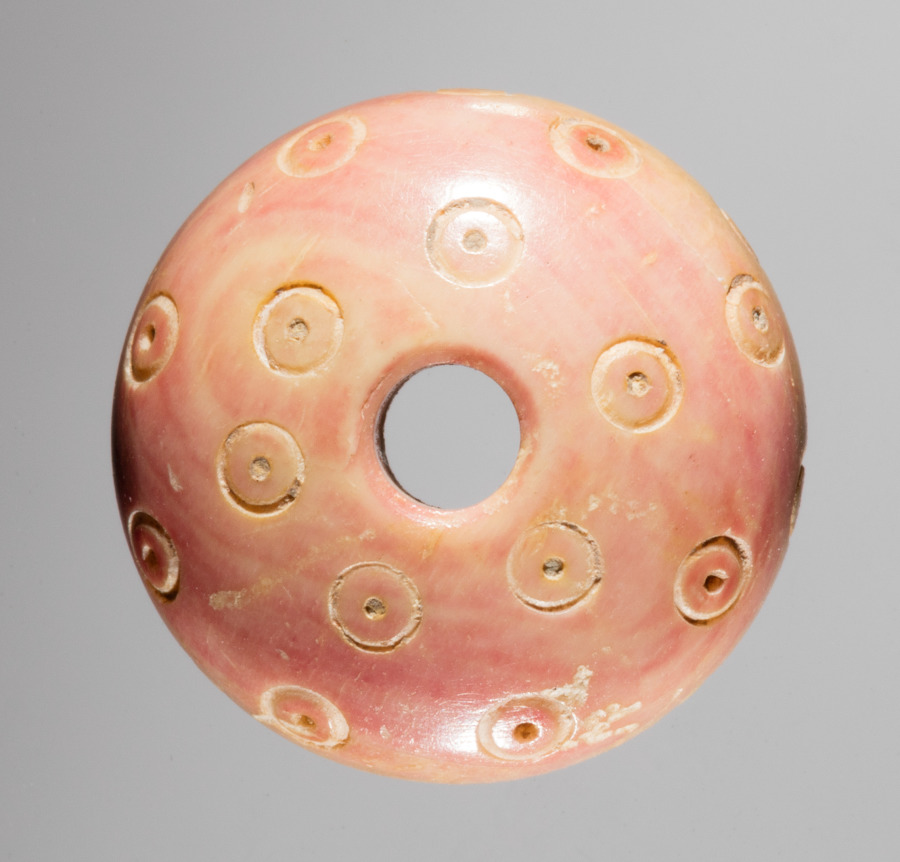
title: Spindle Whorl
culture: Iran, early Islamic period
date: 700s - 900s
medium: bone, incised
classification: Spindle Whorl